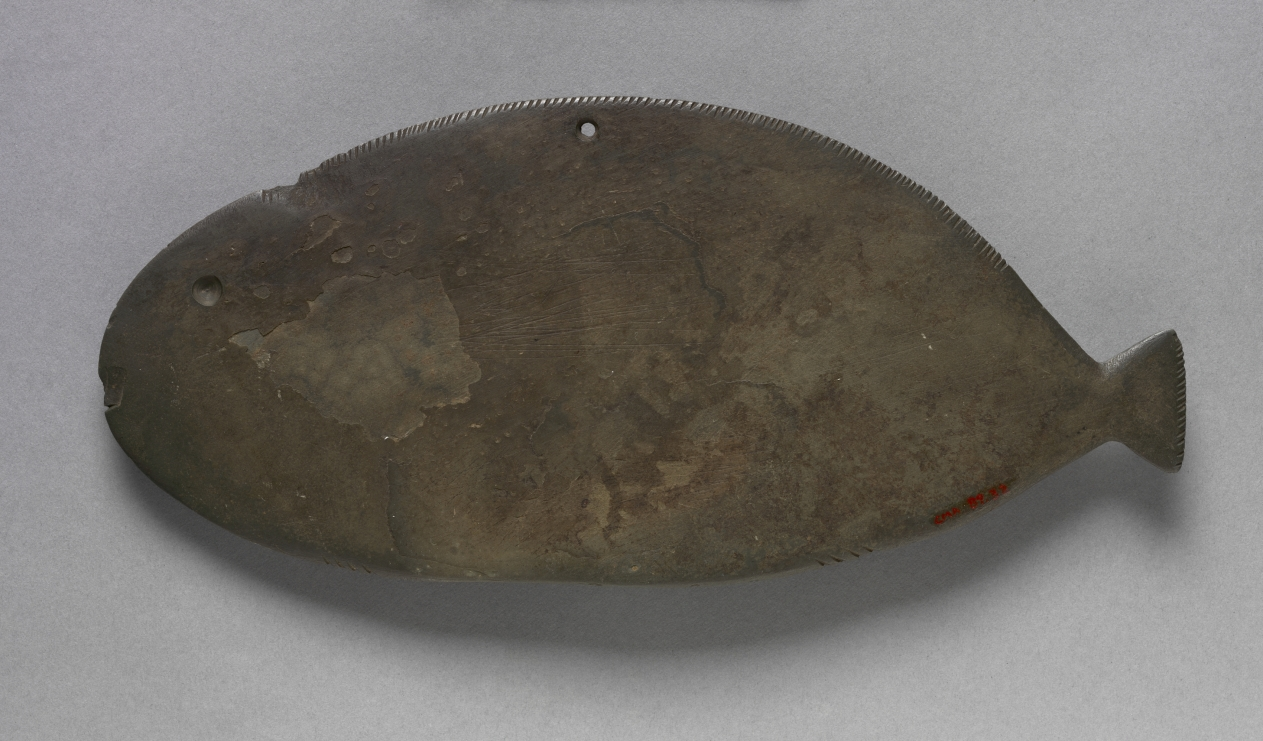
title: Palette in the Form of a Fish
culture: Egypt, Predynastic (5000–2950 BCE), Naqada II–III (3650–3000 BCE)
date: c. 3500–2950 BCE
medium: graywacke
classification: Implements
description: Stone palettes were used for grinding eye paint worn for cosmetic purposes and to protect against sun glare and eye infections. There were two types: green, made from malachite (copper ore), and black, made from galena (lead ore). As funerary items, these ores may have had a deep significance for the deceased as symbols of regeneration and rebirth: the rich soil of the banks of the Nile (black), and the lush vegetation it sustained (green).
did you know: This fish shape is one of the most common for Egyptian cosmetic palettes.